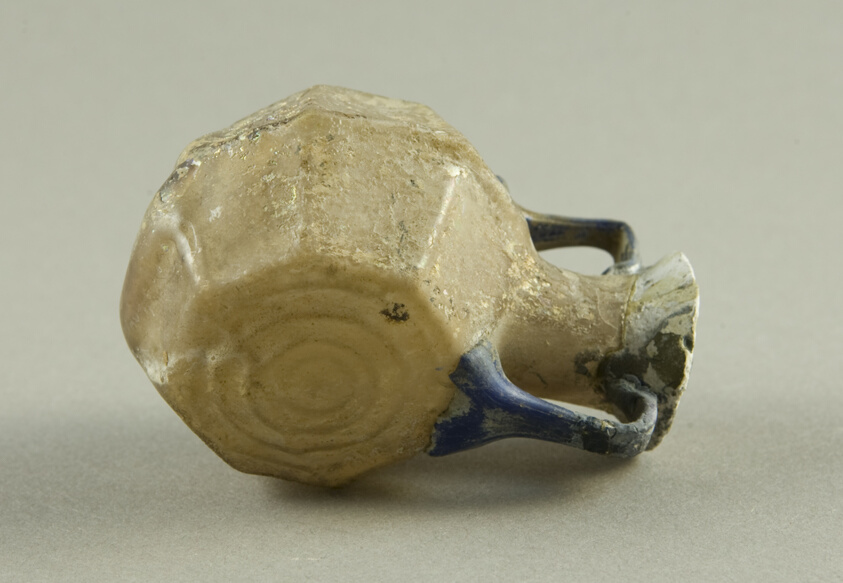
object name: Vessel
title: Vase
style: roman (ancient, style or period), ancient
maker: Roman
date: 1st century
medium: Glass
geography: Italy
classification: glass; vessel; ancient art